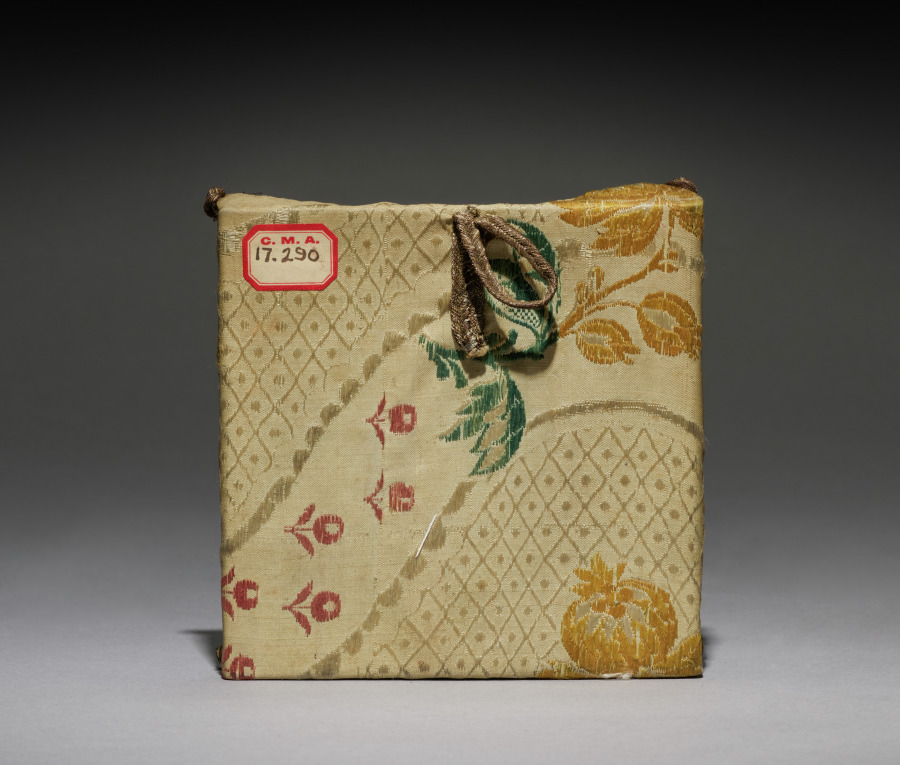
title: Christ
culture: France, 17th century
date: 17th Century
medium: ivory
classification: Ivory